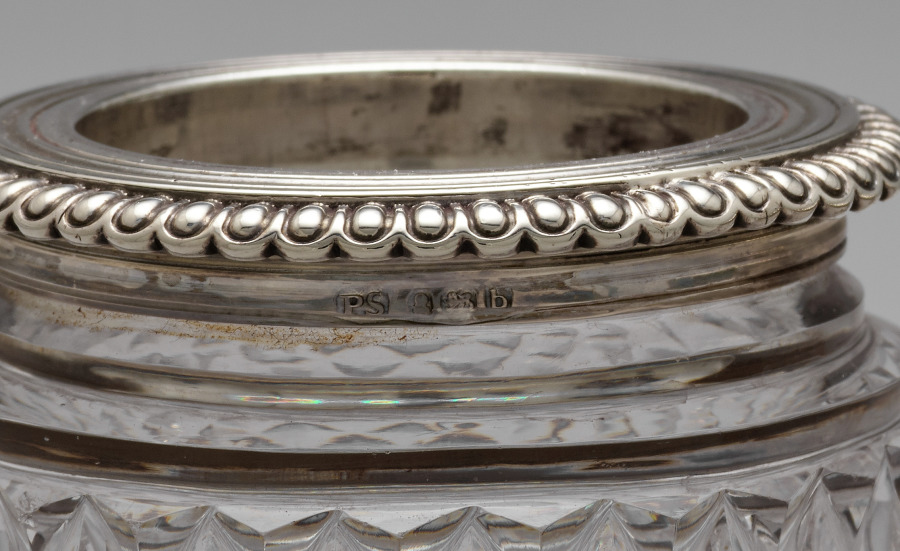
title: Pot (1 of 2)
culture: England, 19th century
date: 1817–18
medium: cut glass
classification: Glass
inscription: Stamped on rim: "PS", George III duty mark, Lion Passant, "b".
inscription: Scratched on base: "3136".